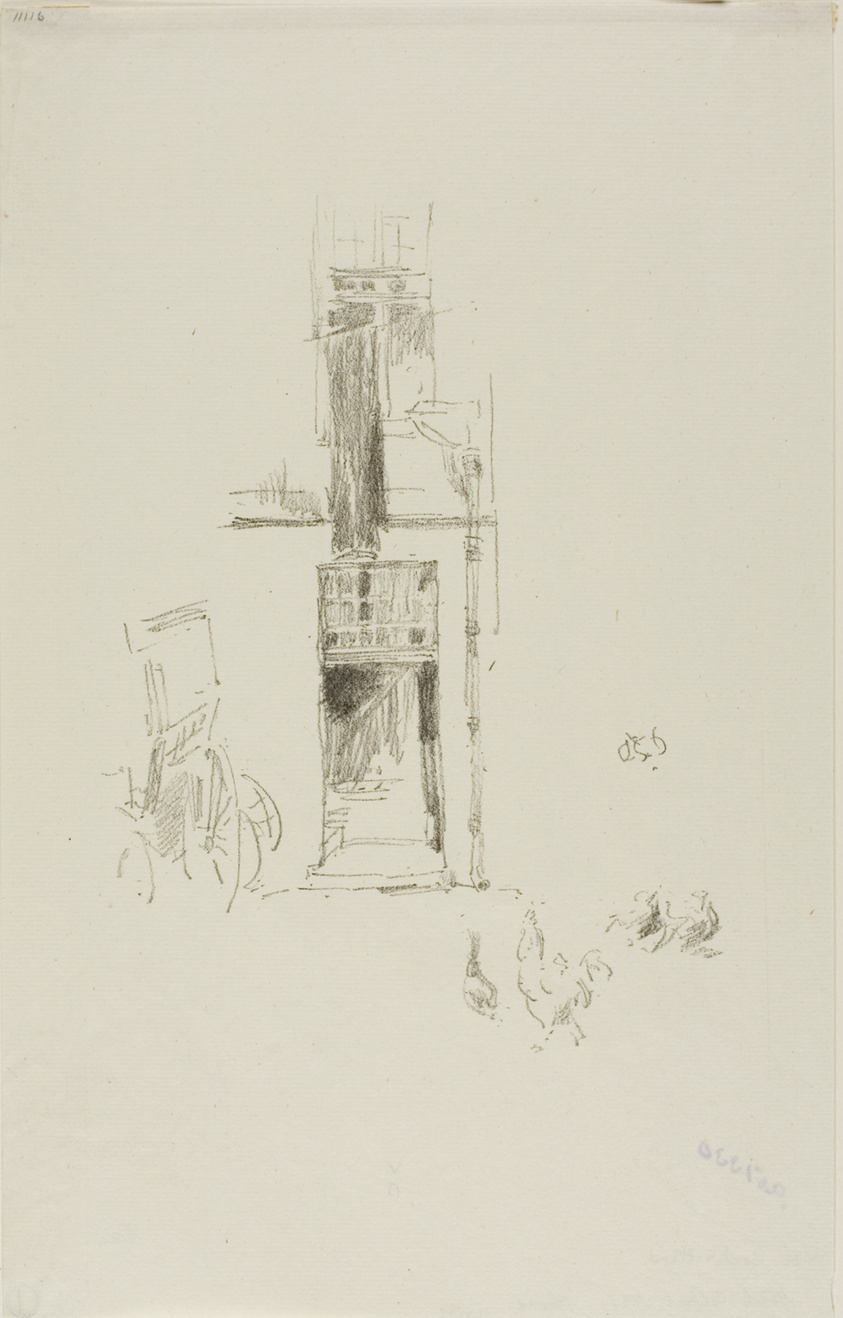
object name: Print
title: Cocks and Hens, Hôtel Colbert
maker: James McNeill Whistler (American, 1834-1903)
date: 1891, printed 1904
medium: Transfer lithograph in black on ivory laid paper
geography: United States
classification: transfer lithograph; lithograph; print; prints and drawing; paper